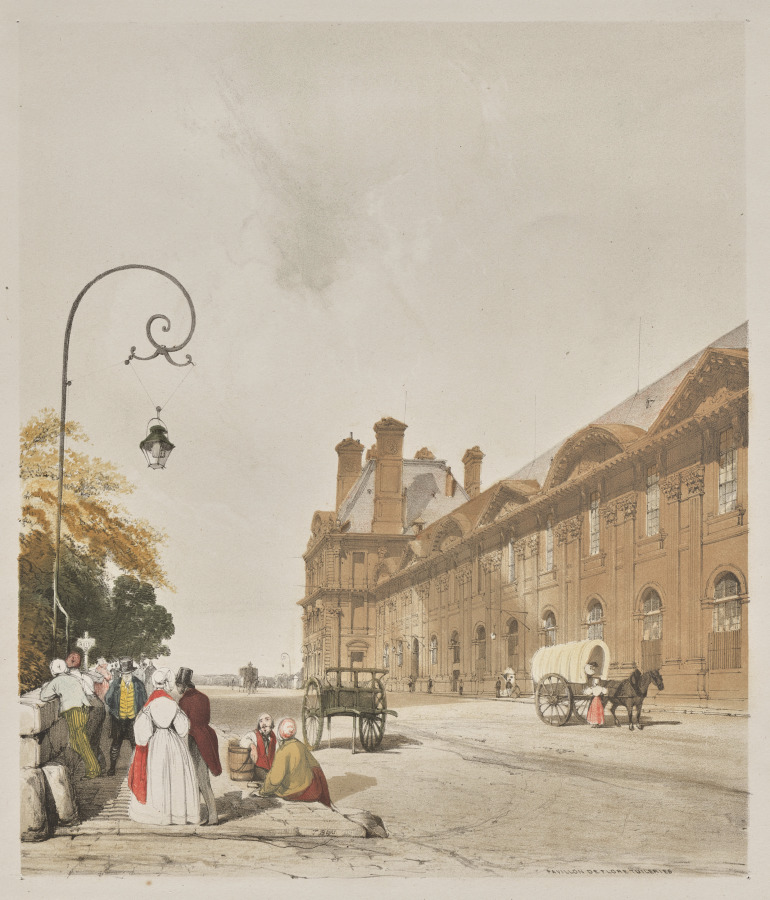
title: Picturesque Architecture in Paris, Ghent, Antwerp, Rouen: Pavillion de Flors, Tuileries, Paris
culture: England, 19th century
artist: Thomas Shotter Boys (British, 1803–1874)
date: 1839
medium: lithograph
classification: Portfolio